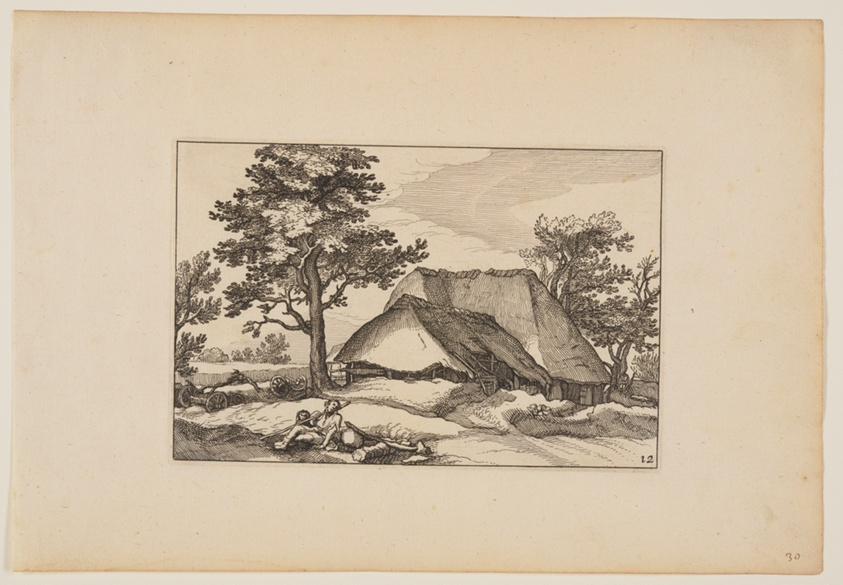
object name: Print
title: Barns, Resting Herd and Dog in Centre Foreground, from Landscapes (Verscheyden aerdige Lanthuysen...)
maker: Claes Jansz. Visscher (Netherlandish, c. 1550–c. 1612); after Abraham Bloemaert (Dutch, 1566–1651)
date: 1620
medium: Etching on ivory laid paper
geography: Netherlands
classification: print; paper; prints and drawing; etching